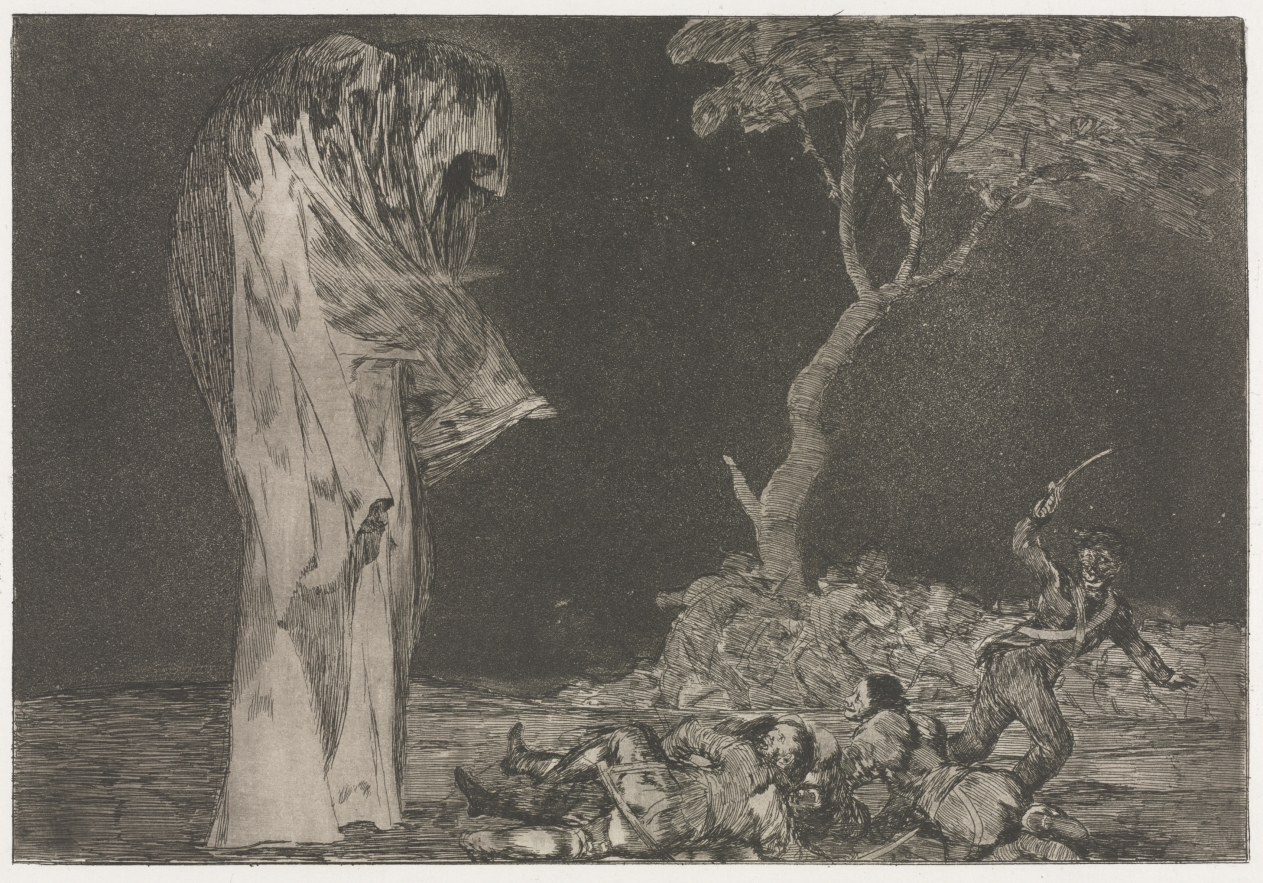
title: The Proverbs: Folly of Fear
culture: Spain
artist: Francisco de Goya (Spanish, 1746–1828)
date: 1864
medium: etching and aquatint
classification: Print